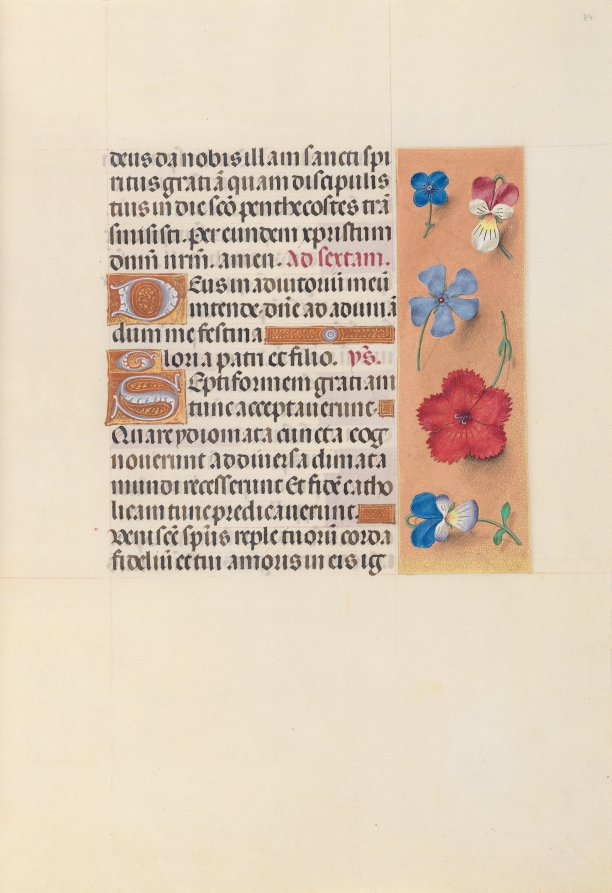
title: Hours of Queen Isabella the Catholic, Queen of Spain: Fol. 34r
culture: Flanders, Ghent and Bruges, late 15th century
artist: Master of the First Prayerbook of Maximillian (Flemish, c. 1444–1519)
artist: and Associates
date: c. 1500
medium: ink, tempera, and gold on vellum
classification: Bound Volume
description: This manuscript was illuminated by a circle of at least five highly organized manuscript painters active in the Flemish cities of Ghent and Bruges. The principal illuminator was Alexander Bening, who painted the majority of the book's miniatures. Manuscripts produced by this circle of artists are renowned for the decoration of their borders, which typically feature a rich variety of realistically-painted flowers, birds, and butterflies. This prayer book, called a book of hours, was intended not for a cleric, but for the private devotions of a lay person-in this case, Isabella the Catholic, Queen of Spain (1451-1504). Isabella's coat of arms embellishes the book's frontispiece. It is unlikely that the book was commissioned by the Queen herself; rather, she probably received it as a diplomatic gift from someone courting her patronage, perhaps Cardinal Francisco Jimenez de Cisneros. A Franciscan friar, Jimenez was dependent upon Isabella for his advancement, first to the post of Queen's confessor in 1492, and then to Archbishop of Toledo in 1495.